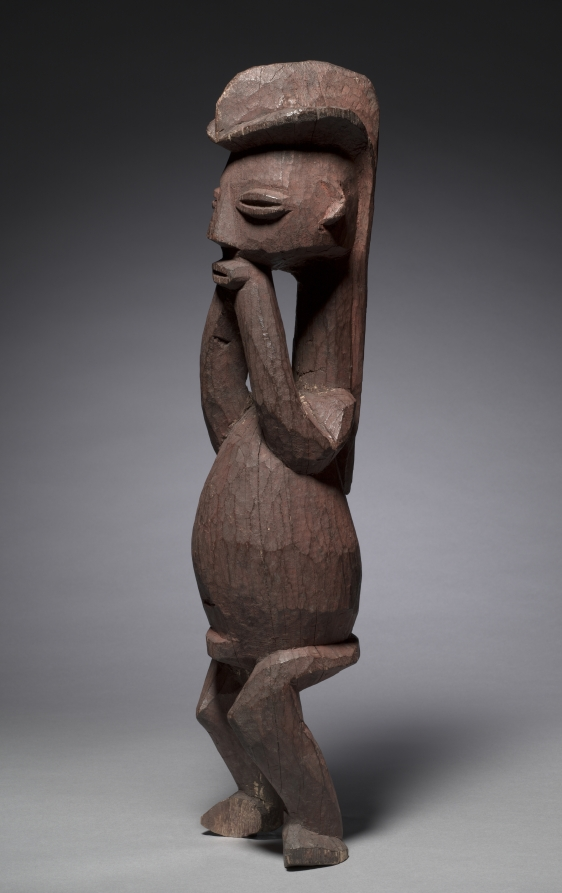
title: Male Figure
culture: Africa, Central Africa, Democratic Republic of Congo, Hungaan-style maker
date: mid- to late 1800s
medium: Wood and colorant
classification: Sculpture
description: Hungaan figures of this size served as guardians of ritual shrines and functioned in rituals to promote fertility, guarantee well-being, and ensure longevity. The striking crested hairstyle imitates a real coiffure or a wig, indicative of status and prestige. The hands supporting the chin identify the figure as a chief who is immersed in thought and contemplation, pondering over his responsibilities.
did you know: The red powdery surface of this figure mimics a red body adornment that mixed ground camwood with palm oil.